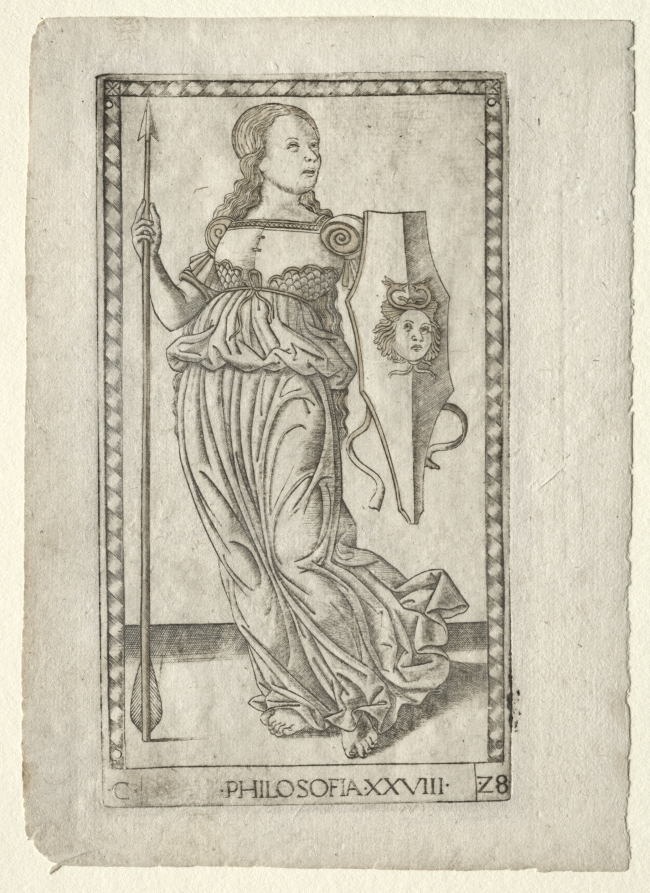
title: Philosophy (from the Tarocchi, series C: Liberal Arts, #28)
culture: Italy, Ferrara, 15th century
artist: Master of the E-Series Tarocchi (Italian, active 1460s)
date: before 1467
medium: engraving, hand-colored with gold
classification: Print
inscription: Lettered below the image of Philosofia (Philosophy): ·C· / ·PHILOSOFIA·XXVIII· / ·28·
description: This engraving is part of the group “C” named Liberal Arts. Conceptually, the liberal arts descended from classical antiquity, and were divided into the Trivium (Grammar, Rhetoric, and Dialectic or Logic) and the Quadrivium (Music, Geometry, Arithmetic, and Astronomy). In the Tarocchi set the total number was risen to ten, with the addition of the three disciplines (Poetry, Philosophy, and Theology). The liberal arts denoted knowledge or skills considered necessary to participate in a free society. By the late Middle Ages, they began to be represented in the visual arts as womanlike allegories. Here, Philosofia (Philosophy) is personified as Athena, goddess of war and wisdom. She holds up a lance in her right hand, while with her left hand firmly grasps her aegis, a shield bearing Medusa’s head. This was believed to have the power of turning any opponent into stone.